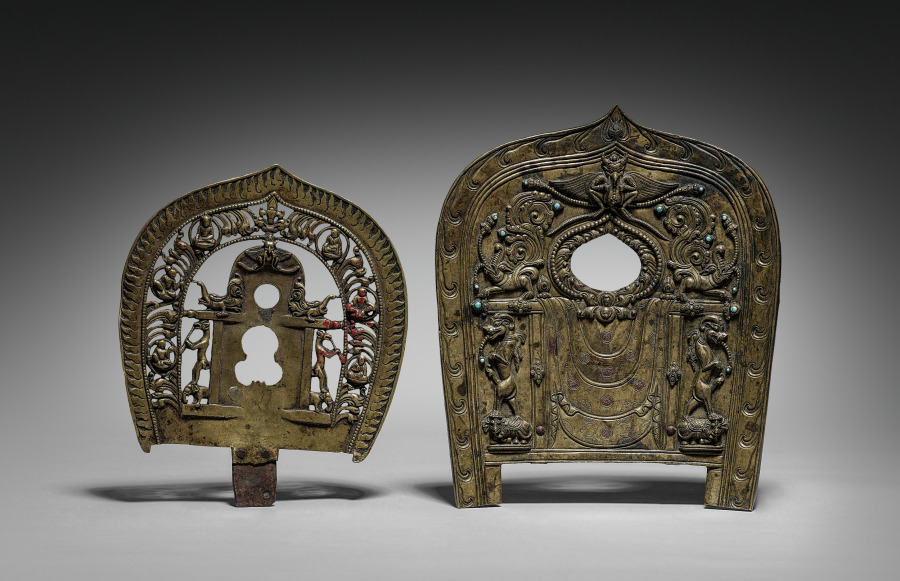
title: Halo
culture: Tibet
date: 1200s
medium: bronze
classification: Sculpture